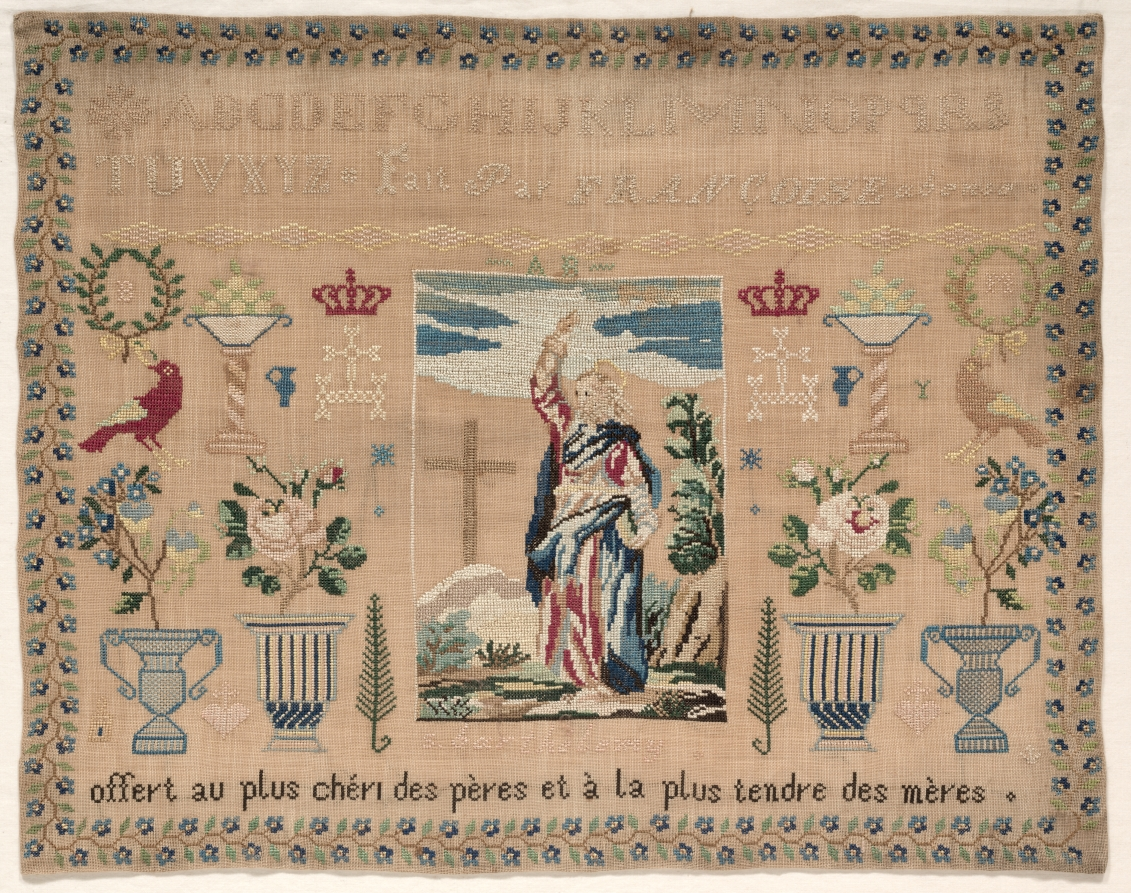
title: Sampler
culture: France, 19th century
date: 1800s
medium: embroidery, silk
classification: Sampler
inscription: above: "ABCDEFGHIJKLMNOPQRS/ TUVXYZ * Fait Par FRANCOIS"; below: "offert au plus chéri des pères et à la plus tendre des mères."